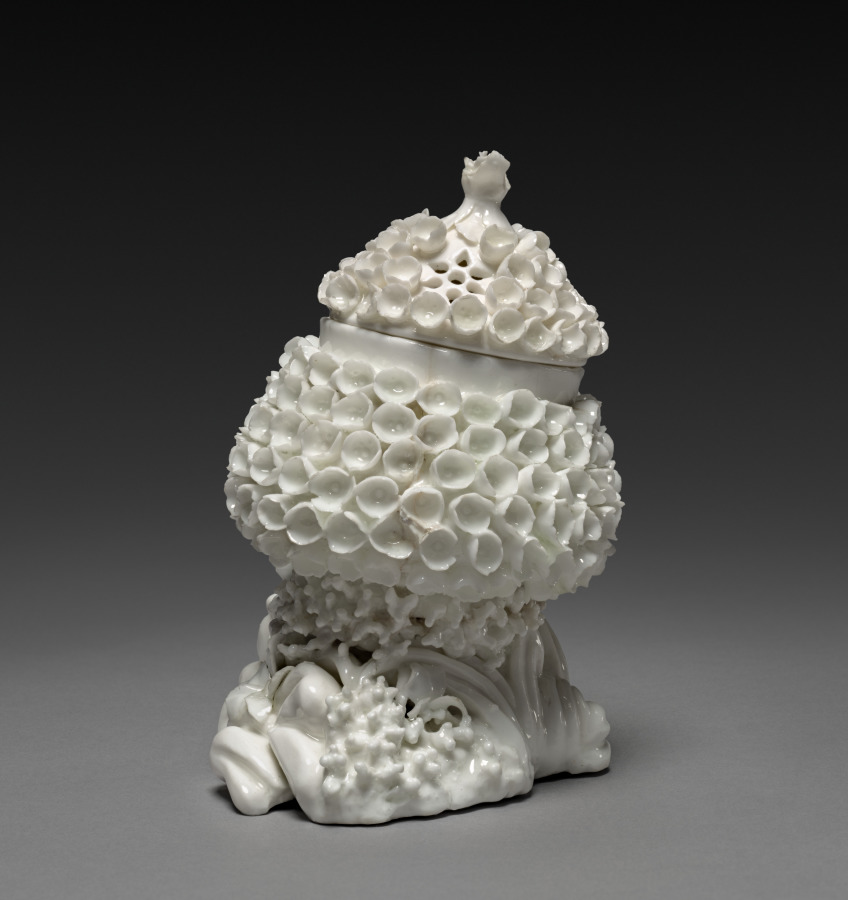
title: Potpourri Vase with Cover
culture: France, Vincennes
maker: Mennecy Factory (French)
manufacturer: Vincennes Porcelain Factory (France, 1740–56)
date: c. 1750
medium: soft-paste porcelain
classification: Ceramic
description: The delicate flowers that cover the lid and base of this vase draw inspiration from the schneeballblüten, or guelder rose, pattern produced at the German Meissen porcelain factory. The flowers on the lid are spaced by small, unobtrusive perforations that allow the scent of the potpourri, a mixture of flowers, herbs, and spices placed inside this vase, to disperse.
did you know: This style of potpourri vase, a pot atop a rockwork base, was popularly produced by major 18th-century porcelain factories including those at Vincennes, Chantilly, and Saint-Cloud.